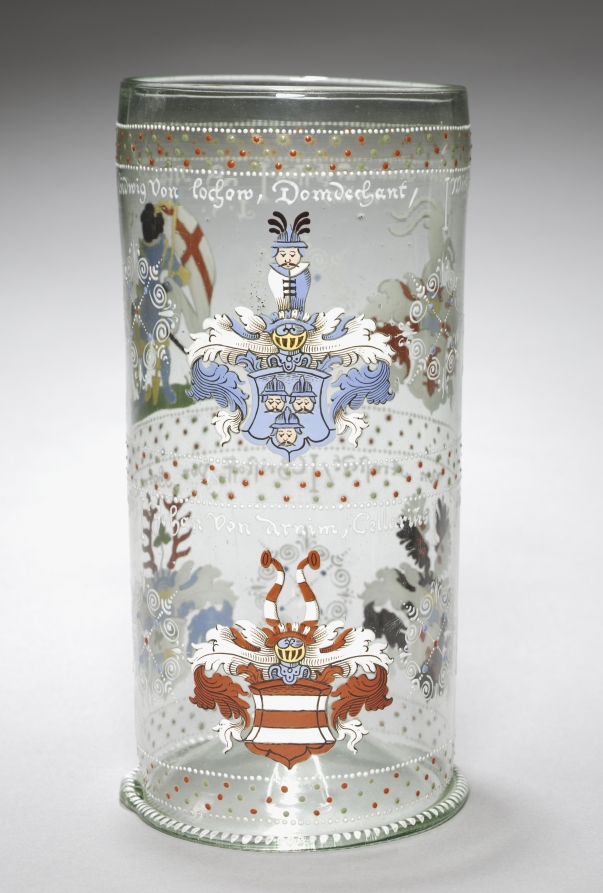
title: Beaker (Humpen)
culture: Germany, probably Bohemia, 16th century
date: 1568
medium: enameled glass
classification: Glass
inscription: LUDWIG VON LOCHOW, DOMDECHANT (dean of a cathedral); JOHAN VON ARNIM, CELLARIUS (a steward of a religious order); CHRISTOFF VON GHORNE, SCHOLASTER (a scholastic).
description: This humpen once belonged to the Chapter of Magdeburg Cathedral. On the upper register is the figure of St. Mauritius, patron saint of Magdeburg and the inscription S. Mauritius, 1568. Armorial shields are accompanied by names of members of the cathedral chapter.